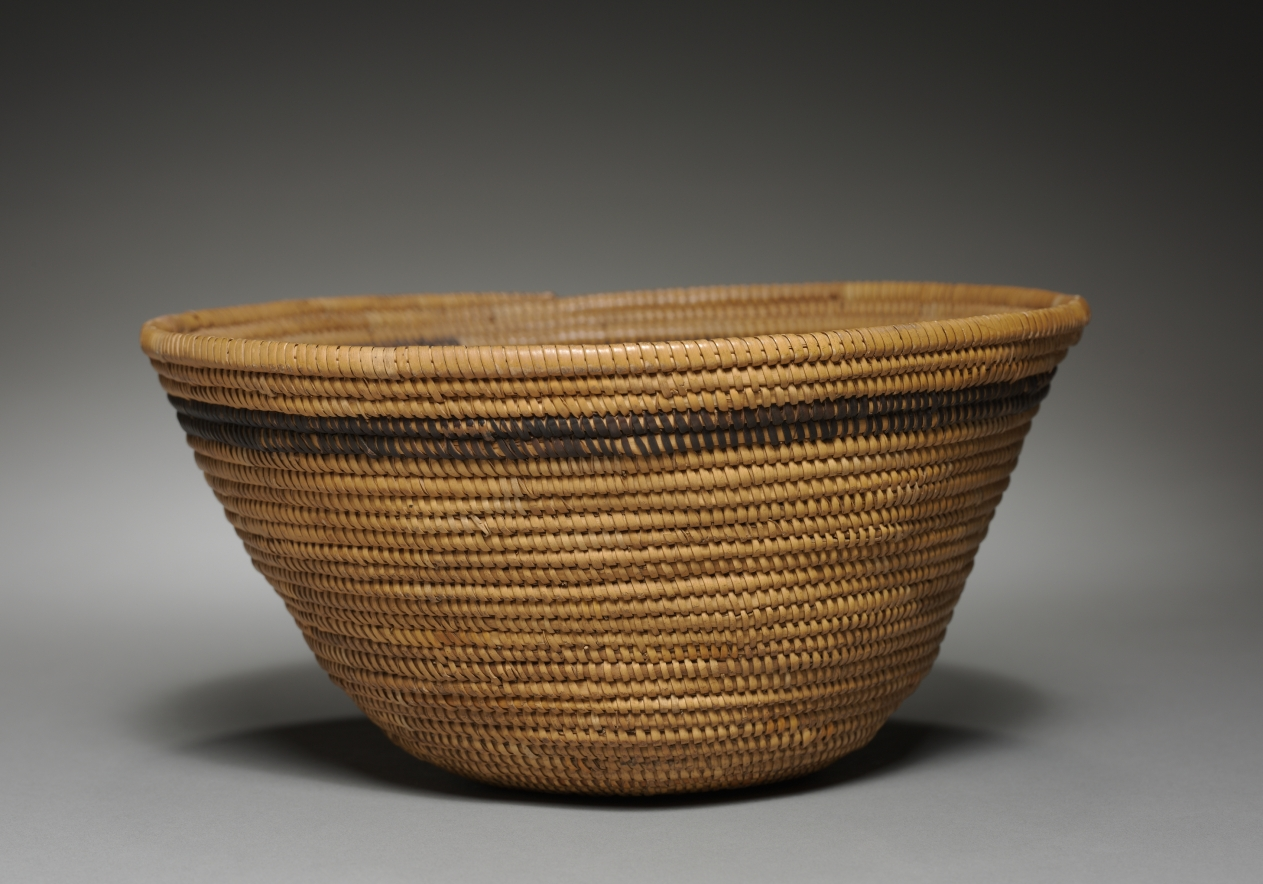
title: Hat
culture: California, Southern, Late 19th- Early 20th century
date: c 1875– 1925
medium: Juncus, Sumac; Coiled; Deergrass foundation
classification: Basketry